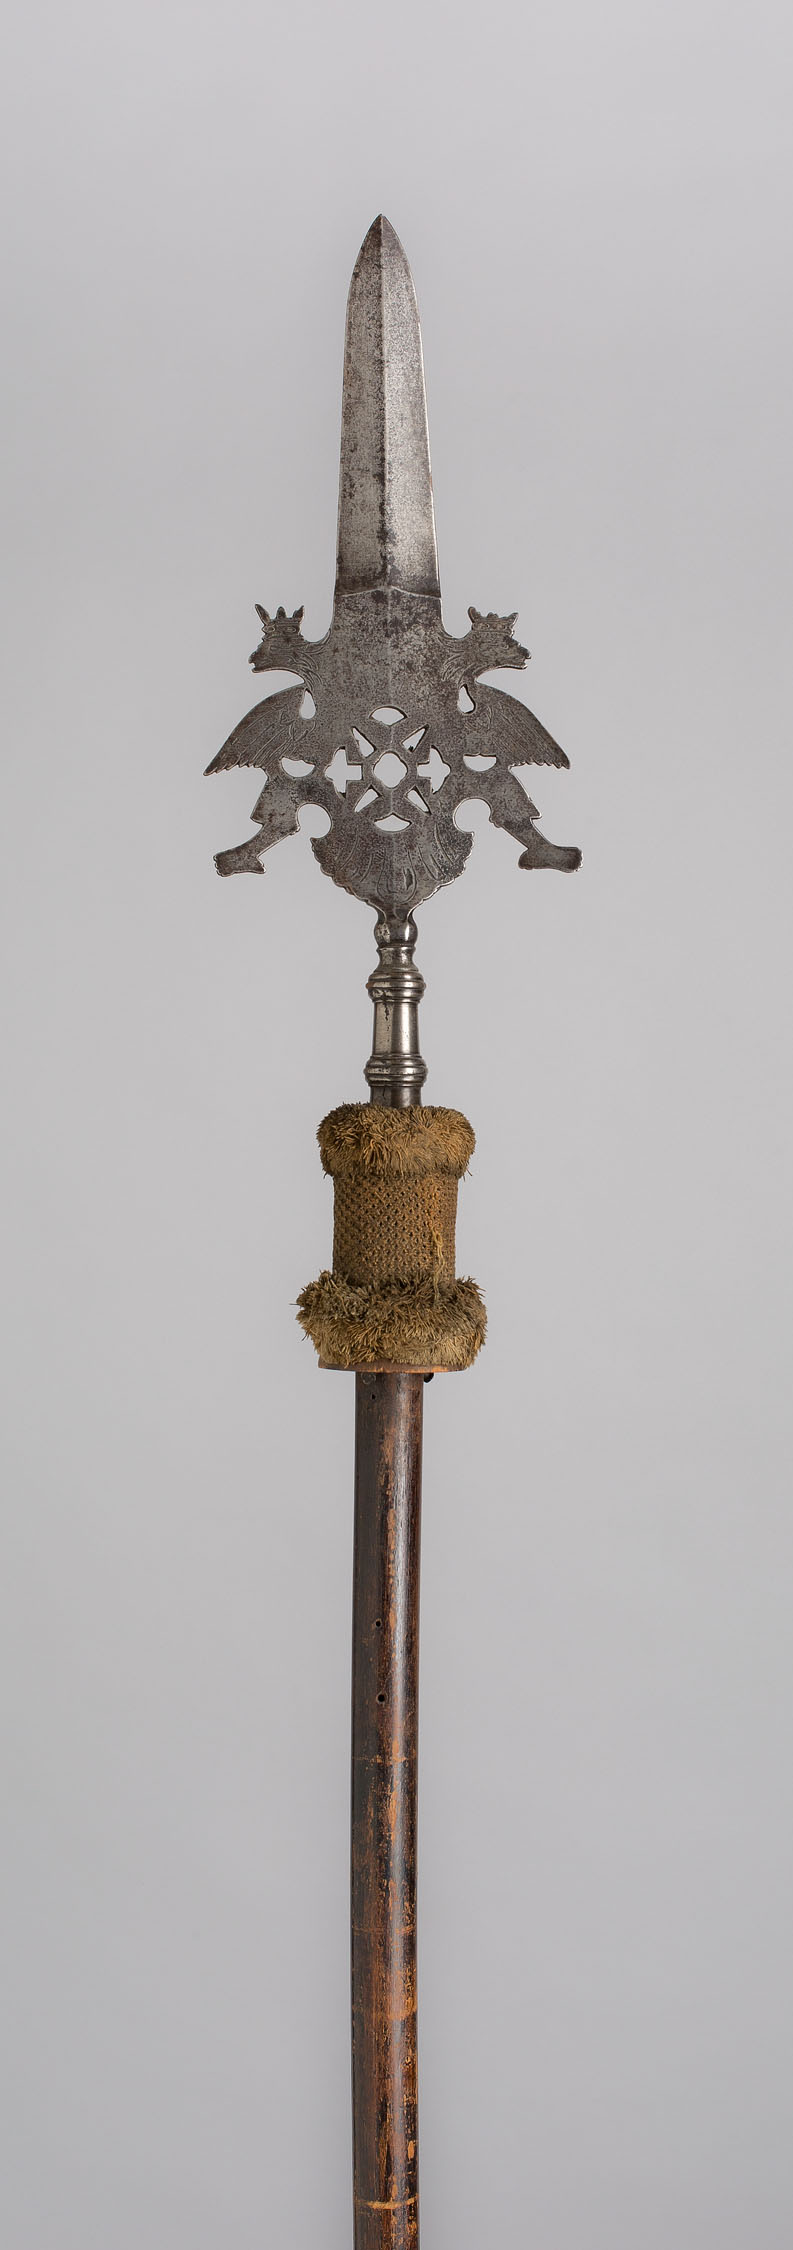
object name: Arms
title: State Partizan of an Officer of the Saxon "Hundred Swiss Guards"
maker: German (Saxony)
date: 1725/1814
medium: Steel, wood (red oak), and thread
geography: Saxony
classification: edged weapon-staff; arms; arms and armor